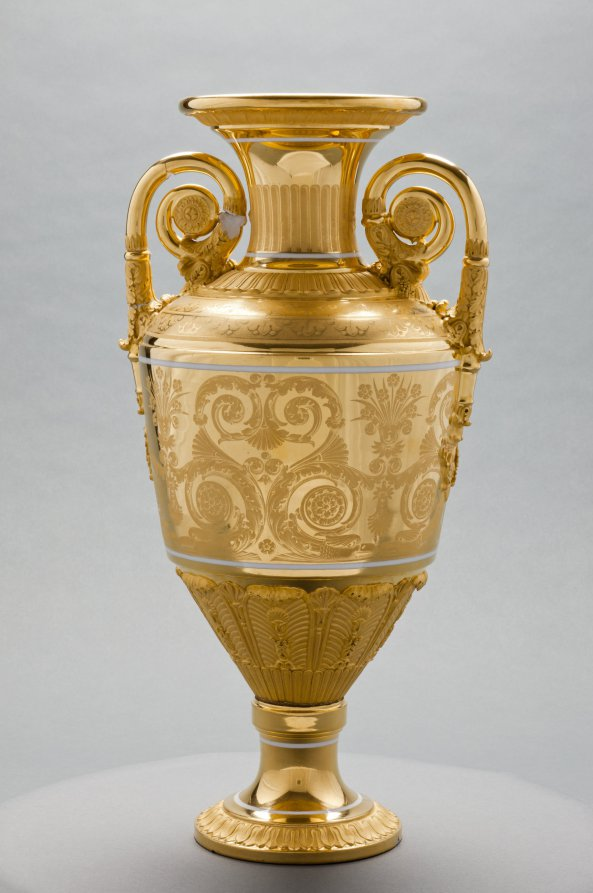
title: Vase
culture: Russia, St. Petersburg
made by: St. Petersburg Imperial Porcelain Factory (Russian)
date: c. 1820–1830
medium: gilt porcelain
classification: Ceramic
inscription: inscribed: "Moreau" in gold near lip.